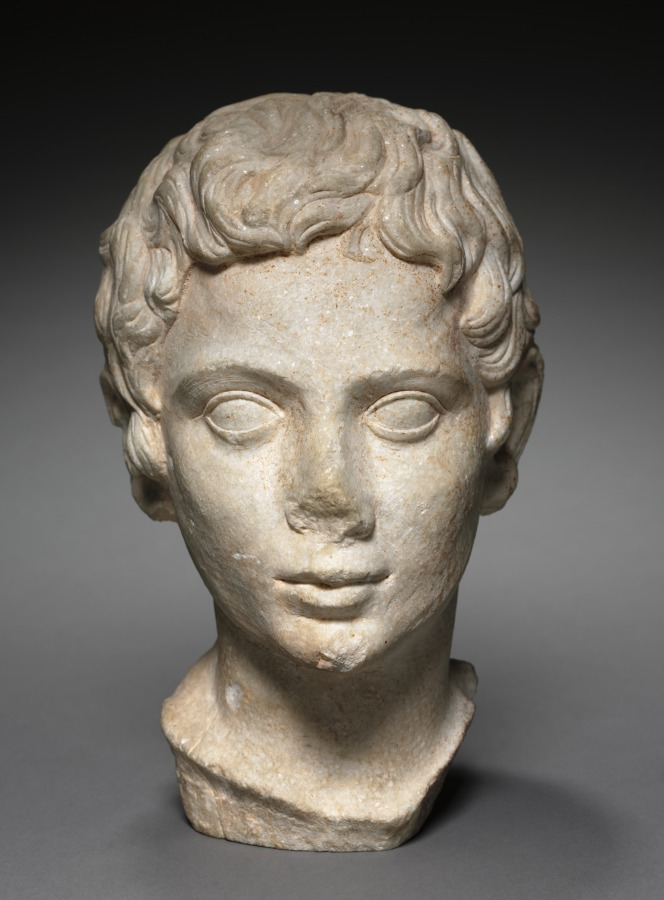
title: Portrait Head of a Youth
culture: Egypt, Alexandria, Roman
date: 1–100 CE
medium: marble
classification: Sculpture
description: Several unusual features of this head suggest that its carving was never finished in antiquity. These include unfinished hair around the ears, small bumps remaining in the hair near the front and top of the head, and the lack of a finely polished surface. Although said to have been found in Egypt, the head is carved of dolomitic marble thought to come from the Saliari region of the northern Greek island of Thasos.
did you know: The carving of this head was never finished.